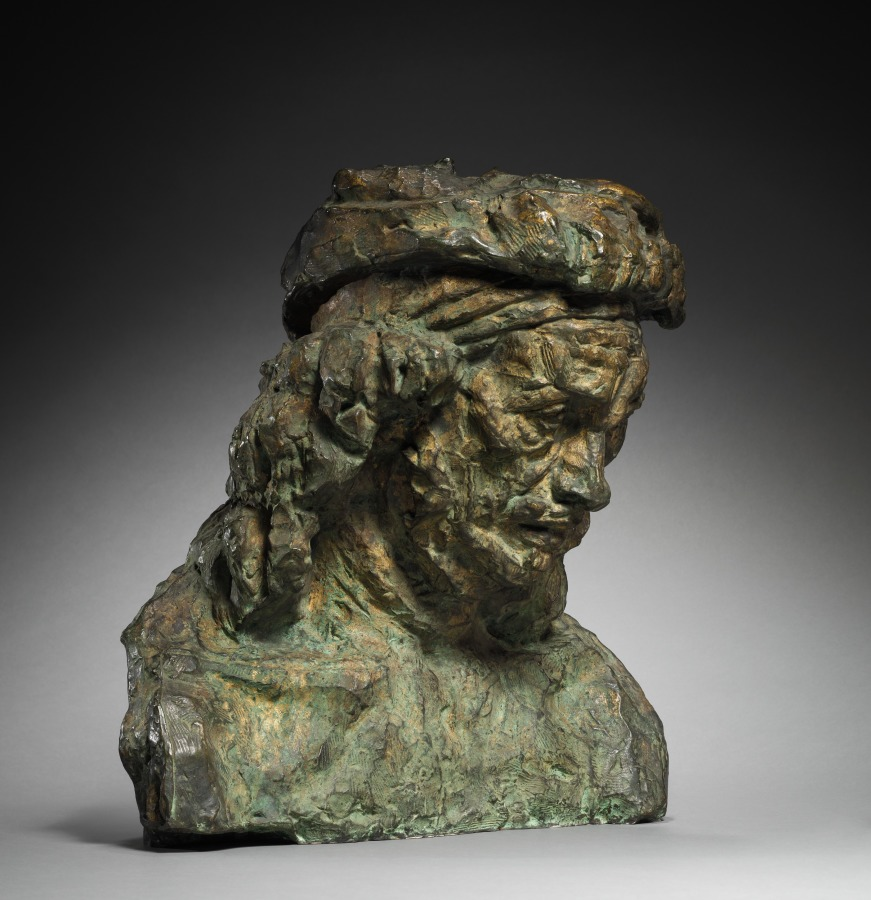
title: The End of Rembrandt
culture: France, 20th century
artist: Emile Antoine Bourdelle (French, 1861–1929)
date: 1909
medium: bronze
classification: Sculpture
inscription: Dated: "1909"